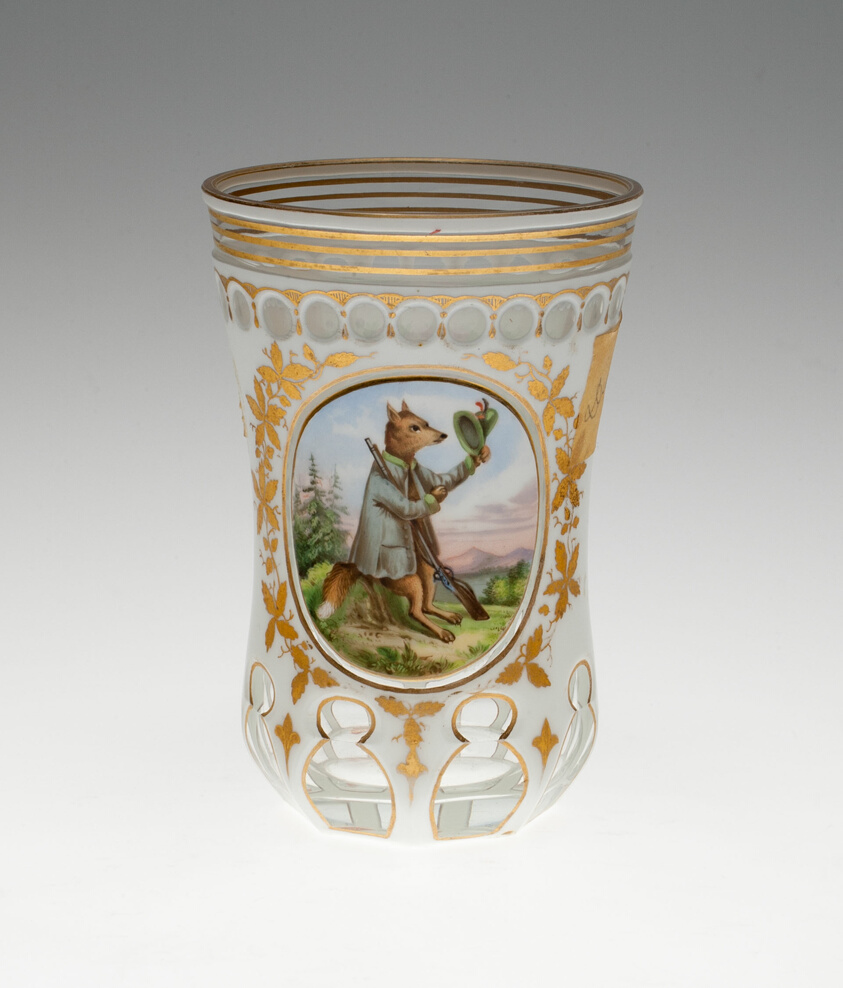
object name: Glass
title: Beaker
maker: Bohemia, Czech Republic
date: c. 1850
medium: Glass; colorless, blown, cut, overlaid with opaque white glass, enameled and gilded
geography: Bohemia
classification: drinking vessel; glass; european decorative arts